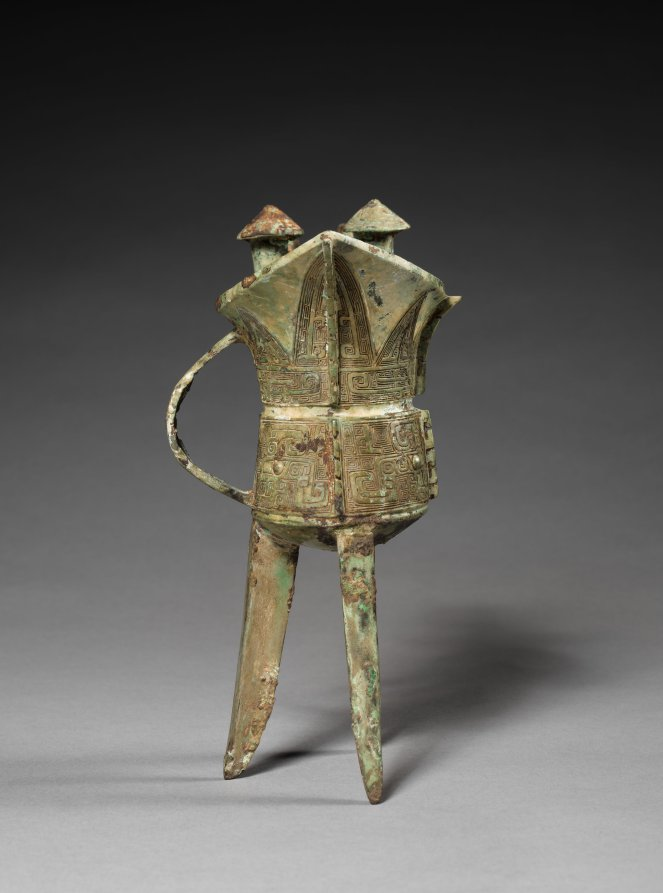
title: Wine Cups (Jue)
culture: China, Shang dynasty (c. 1600–c. 1046 BCE), Anyang phase (c. 1250–1046 BCE)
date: c. 1200 BCE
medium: bronze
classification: Metalwork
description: Wine and food played a major role in ritual offerings to the ancestral spirits and the Supreme Ancestor (Shangdi) performed by the Shang rulers in the state cult of ancestor worship. A variety of wine vessels—each type given a specific name—was cast to bear witness to the power and artistic vitality of this remote civilization. This example of a jue wine cup is for libations. Other major types of wine vessels include jia (wine warming vessel), fangyou (square wine container), and gu (beaker with a trumpeted mouth for pouring).